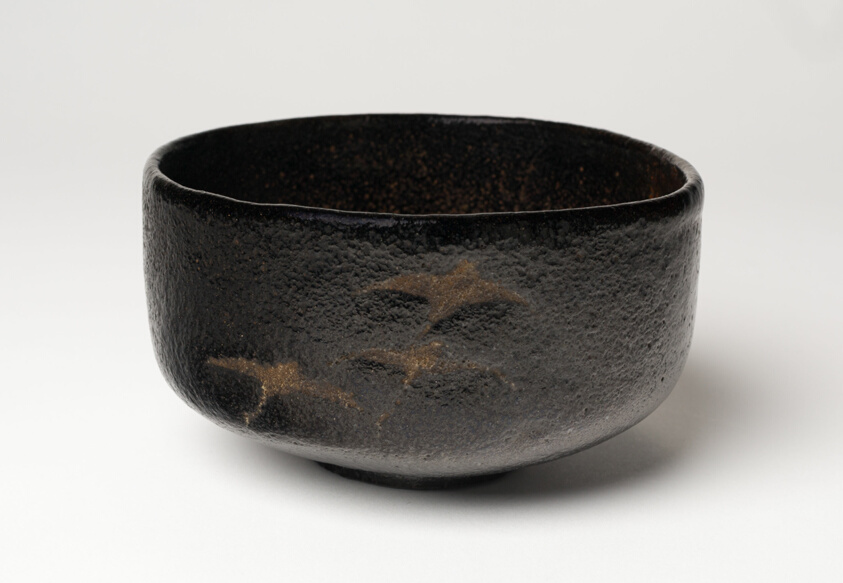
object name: Decorative Arts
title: Raku Ware Tea Bowl with Design of Descending Geese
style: Japanese (culture or style)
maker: Japan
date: Late 18th–early 19th century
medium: Glazed stoneware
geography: Japan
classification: drinking vessel; stoneware; asian art; ceramics; vessel; decorative arts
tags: tea